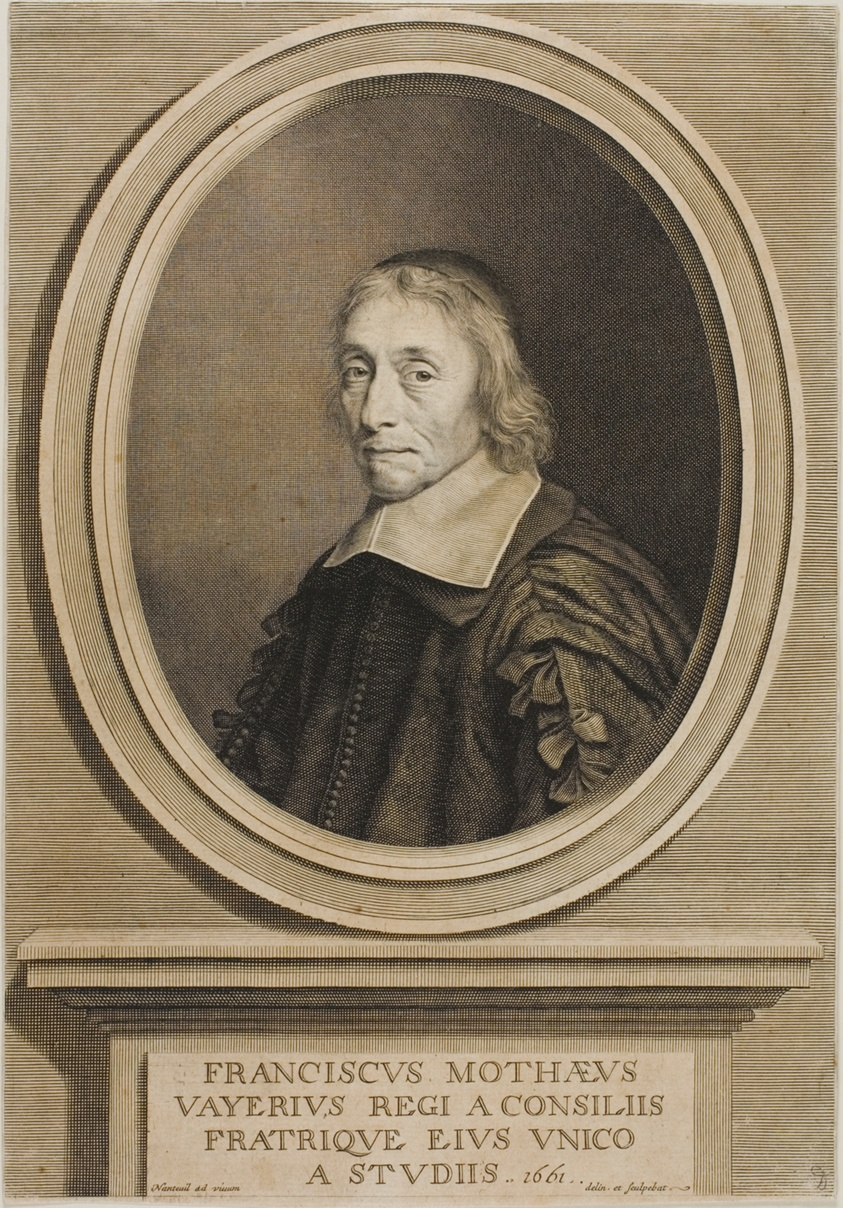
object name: Print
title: François de la Mothe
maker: Robert Nanteuil (French, 1623-1678)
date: 1661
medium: Engraving on cream laid paper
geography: France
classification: engraving; print; prints and drawing